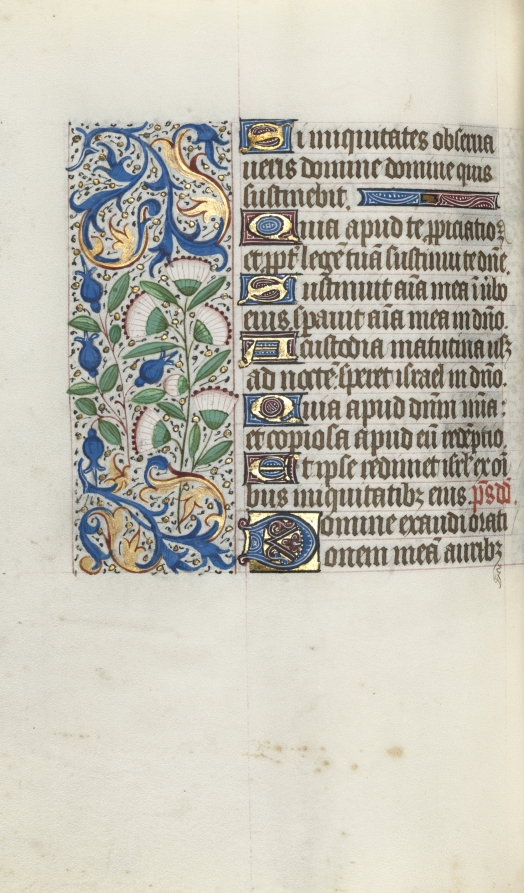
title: Book of Hours (Use of Rouen): fol. 90v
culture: France, Rouen, 15th century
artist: Master of the Geneva Latini (French, active Rouen, 1460–80)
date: c. 1470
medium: ink, tempera, and gold on vellum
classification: Bound Volume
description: In the late 1400s and early 1500s Rouen was an established and important center of book production. The city’s cathedral had a wealthy chapter that spent large sums of money to commission books and to maintain its extensive library. The stationers and booksellers would have likely been concentrated in or near the cathedral precinct. This artist, named after a manuscript now in Geneva, was Rouen’s principal illuminator during the second half of the 1400s.